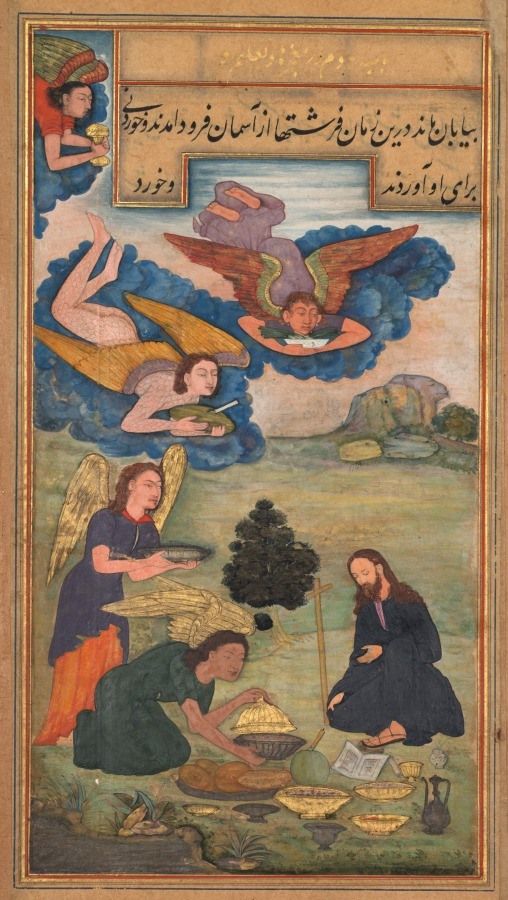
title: Angels bring food to Jesus in the wilderness (folio 55 recto), from a Mirror of Holiness (Mir’at al-quds) of Father Jerome Xavier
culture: Mughal India, Allahabad, made for Prince Salim (1569–1627)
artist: Muhammad Sharif (Indian, active c. 1600)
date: 1602–4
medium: Gum tempera, ink, color, and gold on paper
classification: Manuscript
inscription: Signature of the artist, Muhammad Sharif (Indian, active c. 1600), is written in the tiny pot by Jesus's foot.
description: To end his 40-day fast, five angels brought Jesus refreshments from heaven: breads, melons each with a knife for convenient cutting, fresh leeks, and what appear to be fragrant rice dishes and curries, along with cups of wine. Four of the angels are dressed in robes, and one is clothed only in feathers. After his baptism, Jesus spent 40 days and nights in the desert where he fasted, practiced spiritual exercises, and successfully resisted the temptations of Satan. Many of the rocks in this painting have faces, called grotesques. This page is the only surviving folio from this manuscript that has an artist’s signature, written in the tiny pot by Jesus’s foot.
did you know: The artist has put faces in the rocks, following a Persian convention.